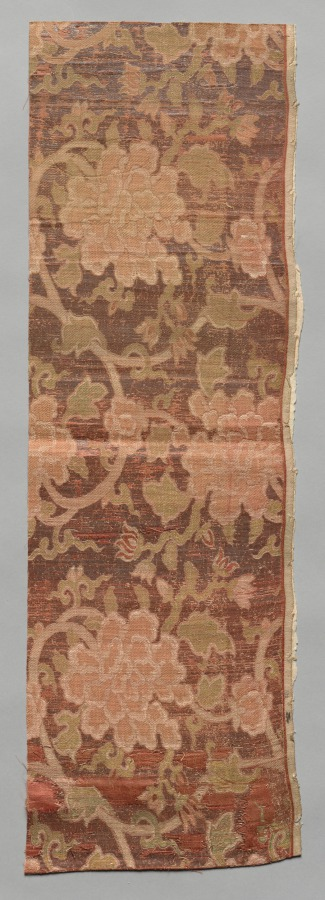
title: Textile Fragment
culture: Japan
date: 1800s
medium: silk, metallic thread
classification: Textile